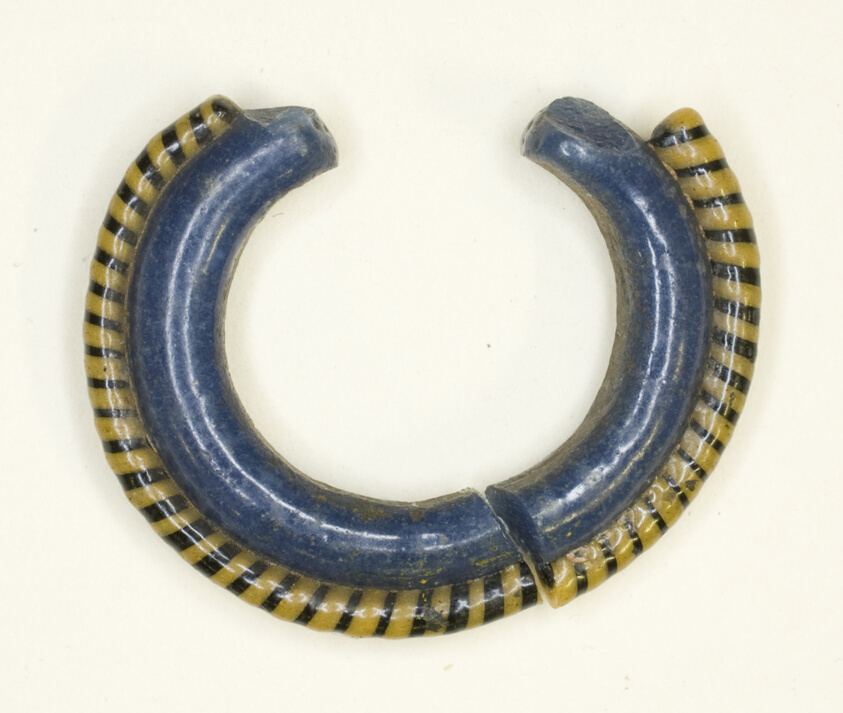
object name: Costume and Accessories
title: Earring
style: egyptian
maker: Egyptian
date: New Kingdom, mid- to late Dynasty 18, about 1400–1295 BCE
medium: Glass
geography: Egypt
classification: glass; jewelry; ancient art; costume